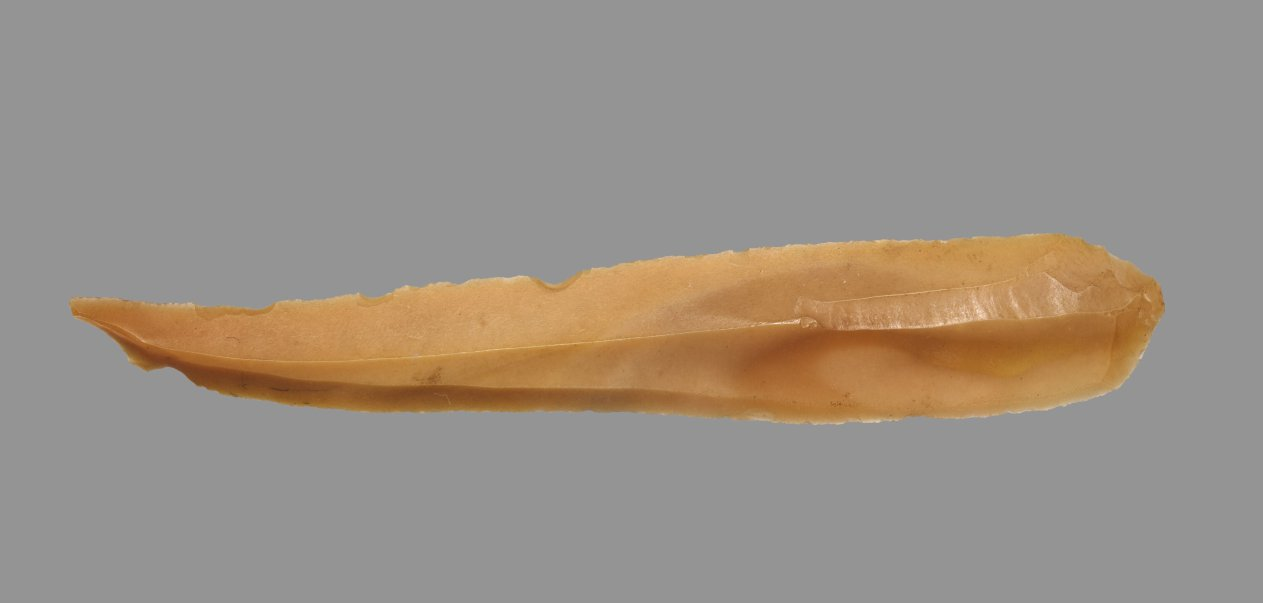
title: Sickle Blade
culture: Egypt, Middle Kingdom (2040–1648 BCE), Dynasty 12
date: 1980–1801 BCE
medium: flint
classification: Implements